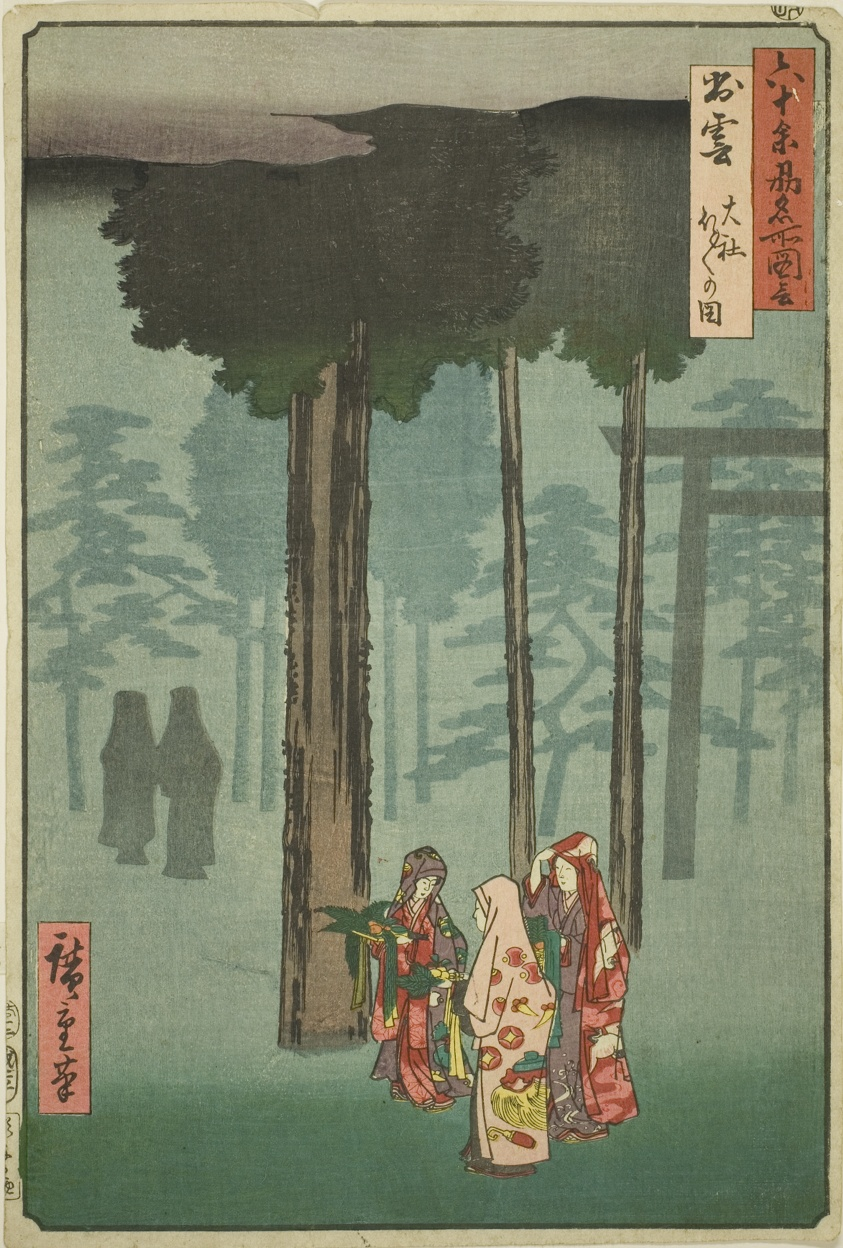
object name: Print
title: Izumo Province: Hotohoto Festival at Izumo Shrine (Izumo, Taisha Hotohoto no zu), from the series "Famous Places in the Sixty-odd Provinces (Rokujuyoshu meisho zue)"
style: Japanese (culture or style)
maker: Utagawa Hiroshige 歌川 広重; Japanese, 1797-1858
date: 1853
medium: Color woodblock print; oban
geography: Japan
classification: woodblock print; print; asian art